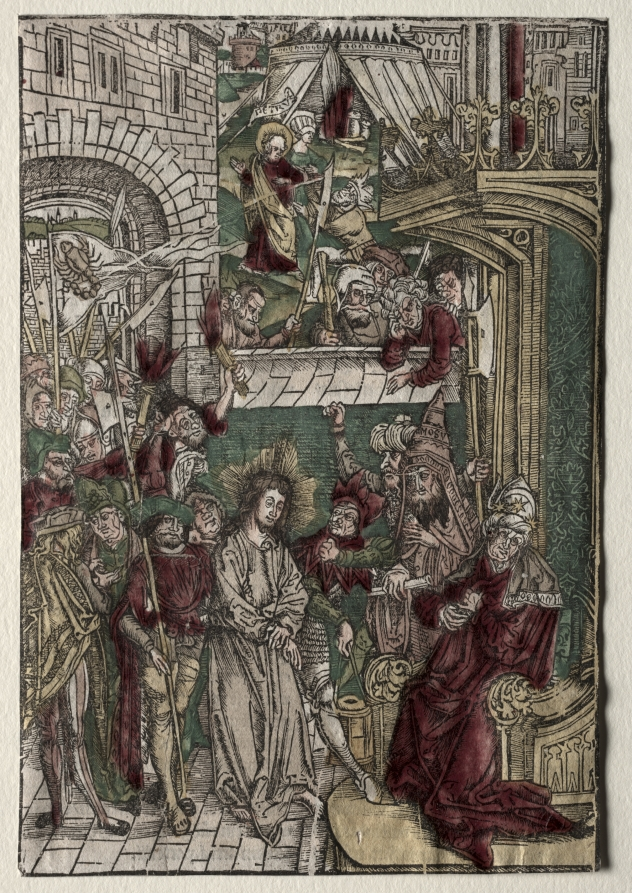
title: Life of Christ: Christ before Pilate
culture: Germany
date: 1400s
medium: woodcut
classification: Print